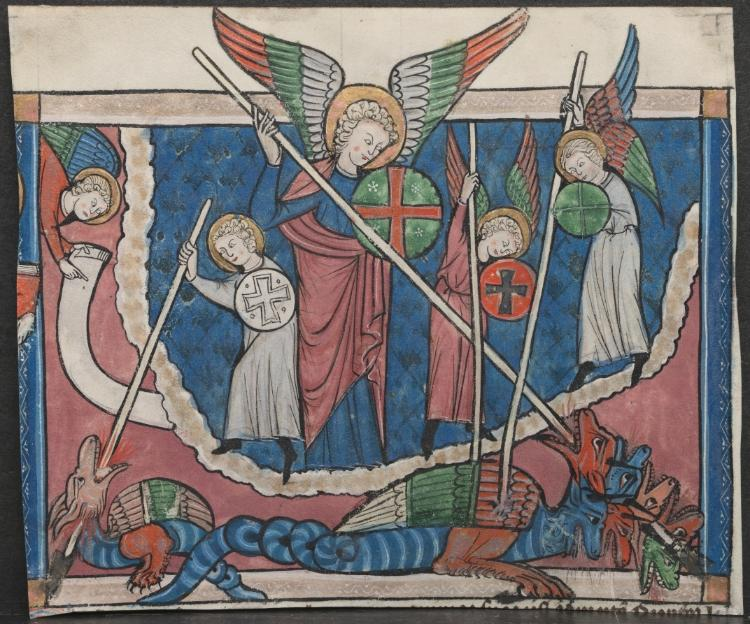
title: Miniature from a Manuscript of the Apocalypse: The War in Heaven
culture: France, Lorraine, 13th century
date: c. 1295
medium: ink, tempera, and gold on vellum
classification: Manuscript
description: The visionary text of St. John the Evangelist's Apocalypse, the final book of the New Testament, inspired these images of salvation, sin, and divine retribution. A large number of illustrated volumes of the Apocalypse appeared in Northern Europe, especially in England, after the year 1240--perhaps reflecting a fear of the world's end. These miniatures come from a manuscript produced in Lorraine, then artistically influenced by English models.